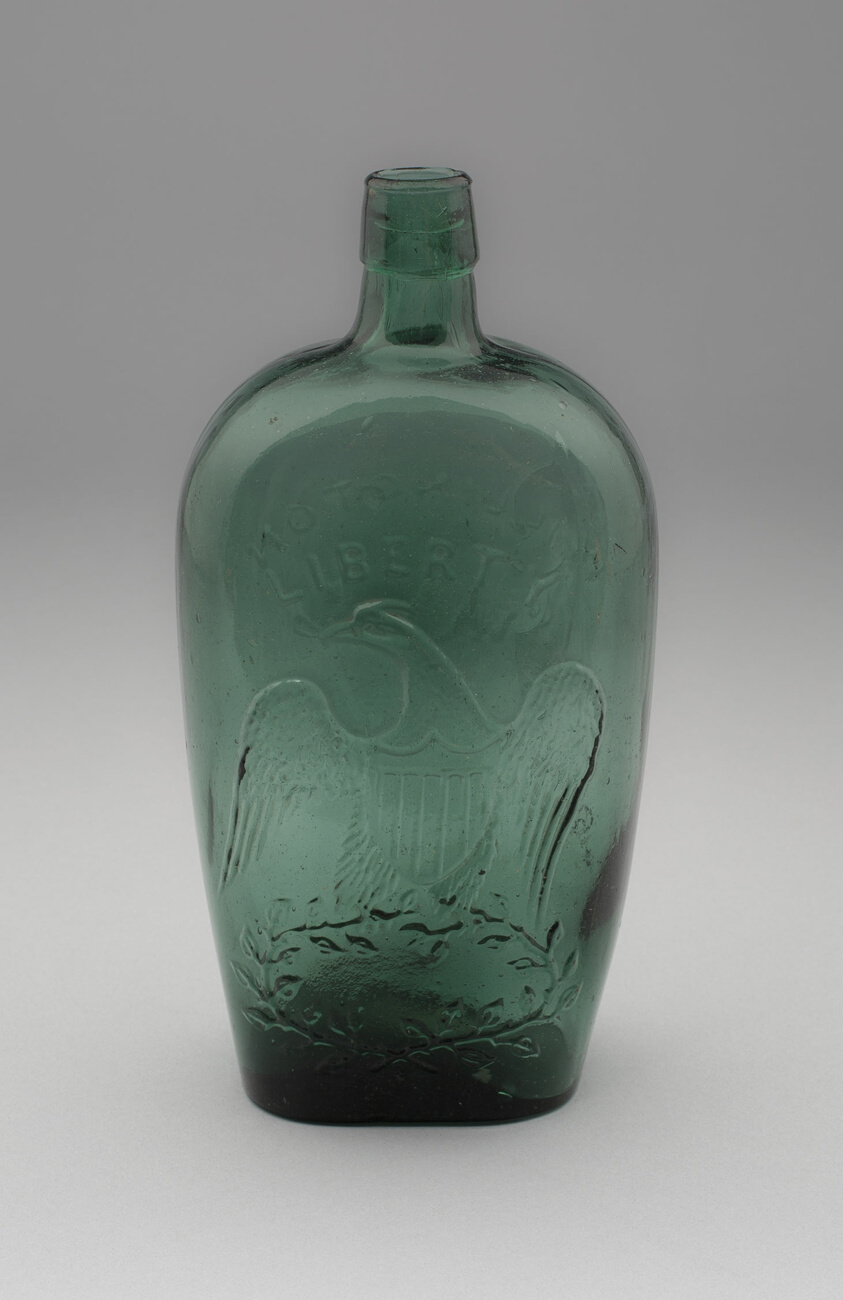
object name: Glass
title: Flask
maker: New London Glassworks; American, c. 1860–c. 1866; New London, Connecticut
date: 1860–66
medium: Glass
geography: New London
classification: flask (bottle); glass; american decorative arts; american arts; decorative arts